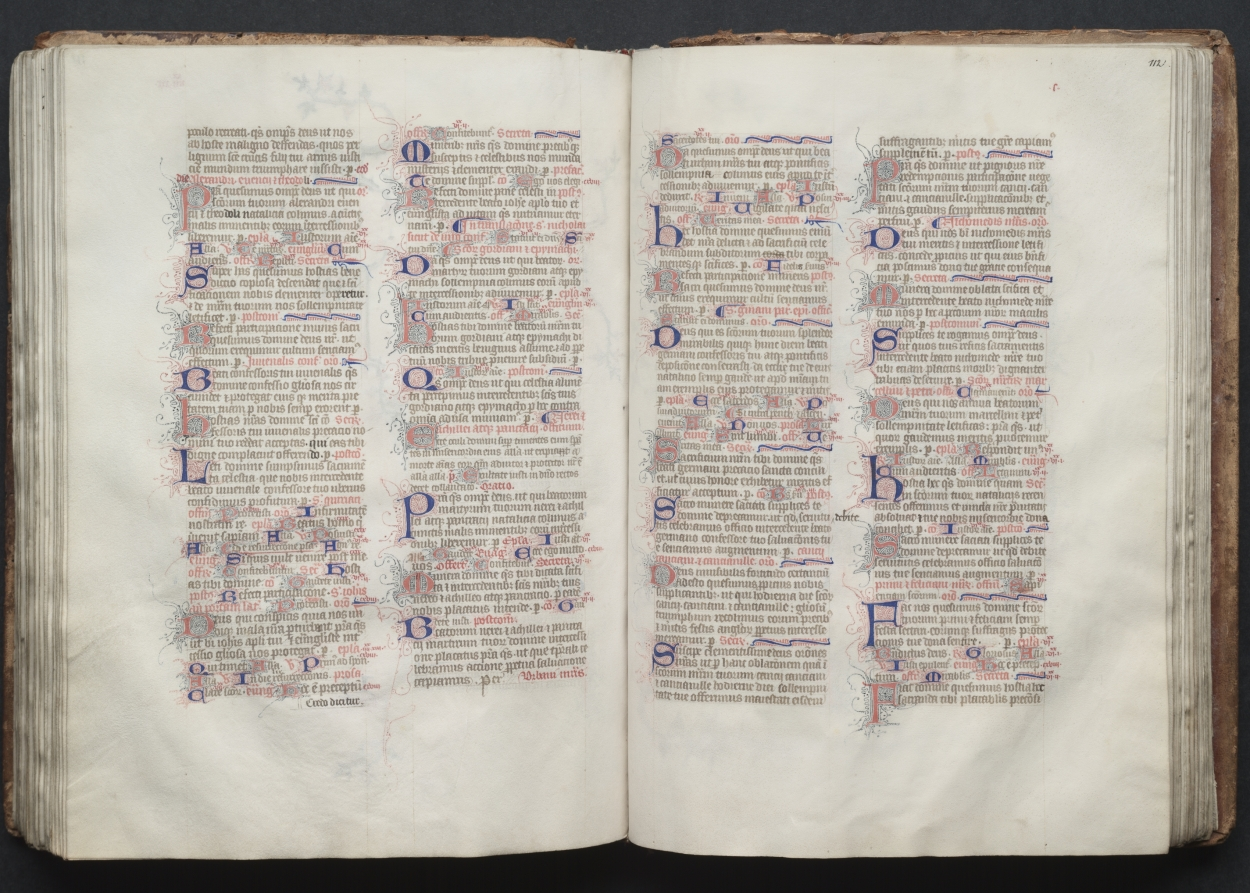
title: The Gotha Missal: Fol. 111v, Text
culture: France, Paris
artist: Master of the Boqueteaux (French)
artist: and Workshop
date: c. 1375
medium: ink, tempera, and gold on vellum; blind-tooled leather binding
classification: Bound Volume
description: The style and quality of this manuscript's decoration is typical of deluxe Parisian books made for aristocratic or royal patrons. Most of the book's decoration appears to be the work of the Master of the Boqueteaux, an artist active at the court of King Charles V (died 1380). His style was apparently shared by a number of book illuminators working in and around Paris. It is very possible that the Gotha Missal belonged to Charles V, but is not provable because the manuscript has no royal portraits and lacks a colophon. Given the book's magnificent decoration, however, it would seem that it was produced for a Valois prince, if not for the king himself. The manuscript receives its name from the German dukes of Gotha, its later owners.